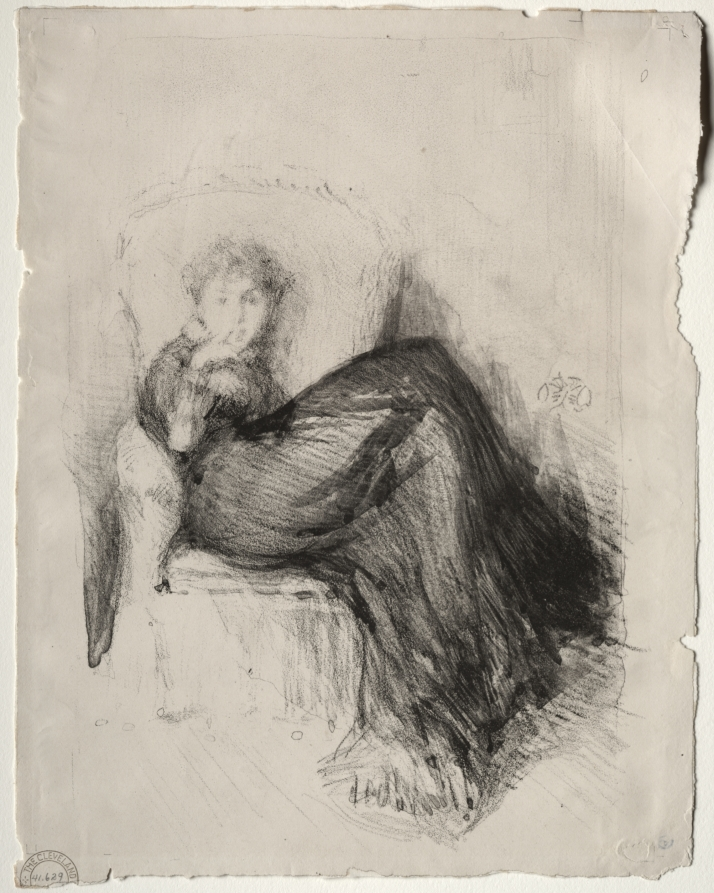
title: Study - Maude Seated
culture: America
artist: James McNeill Whistler (American, 1834–1903)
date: 1878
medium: lithograph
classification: Print